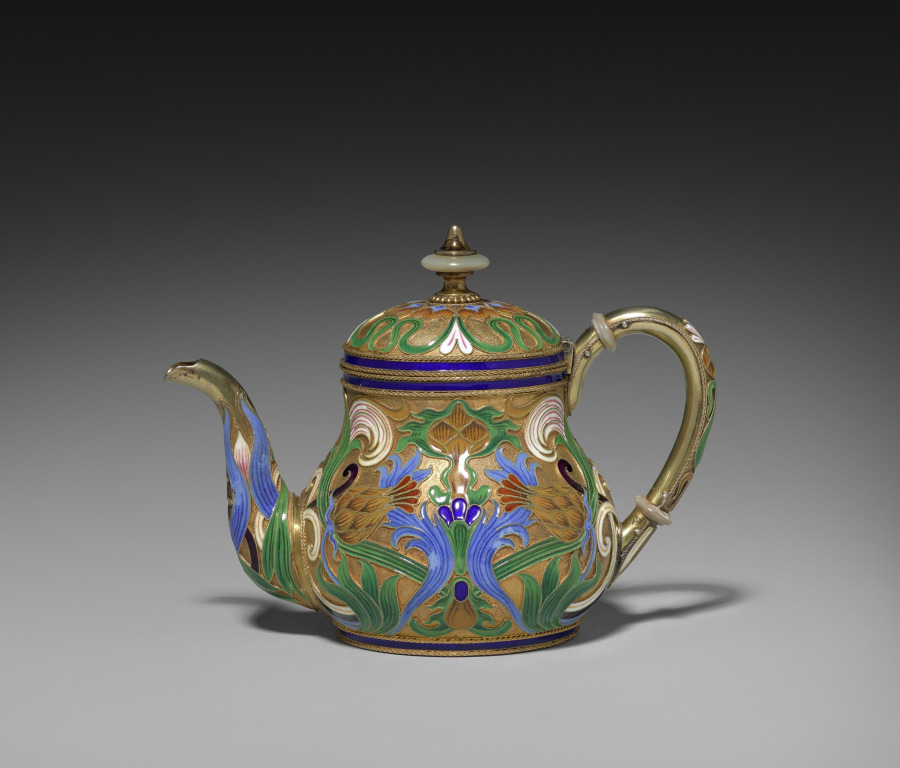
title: Covered Teapot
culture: Russia, St. Petersburg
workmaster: attributed to Feodor Ivanovich Rückert (Russian, 1840–1917)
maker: House of Fabergé (Russian, 1842–1918)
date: 1887–96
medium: silver gilt, opaque cloisonné enamel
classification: Miscellaneous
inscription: 84, St. George [assay mark for Moscow, 1882-1896]; C. Fabergé (in Cyrillic); double-headed eagle [imperial warrant]; St. George; initials of Carl Fabergé (in Cyrillic).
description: Fabergé’s craftsmen in Moscow, especially under the watchful eye of workmaster Feodor Rückert, became known for their work in the pan-Slavic or neo-Russian style, hearkening back to 17th-century motifs of Russian folk art. Often on rather conventional shapes, Rückert and his silversmiths created an explosion of color, achieved through the historic technique of cloisonné enamel in which tiny metal lines are soldered to the surface then filled with glass powders in various colors and fired to create a high gloss finish. The result is a spectacular evocation of the 17th-century originals. Far from mere copies, however, Rückert's designs, such as this tea service, employ naturalistic or abstract motifs in a thoroughly modern adaptation of a remarkable earlier period of Russian art and decoration.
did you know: This covered teapot is part of a larger tea service.